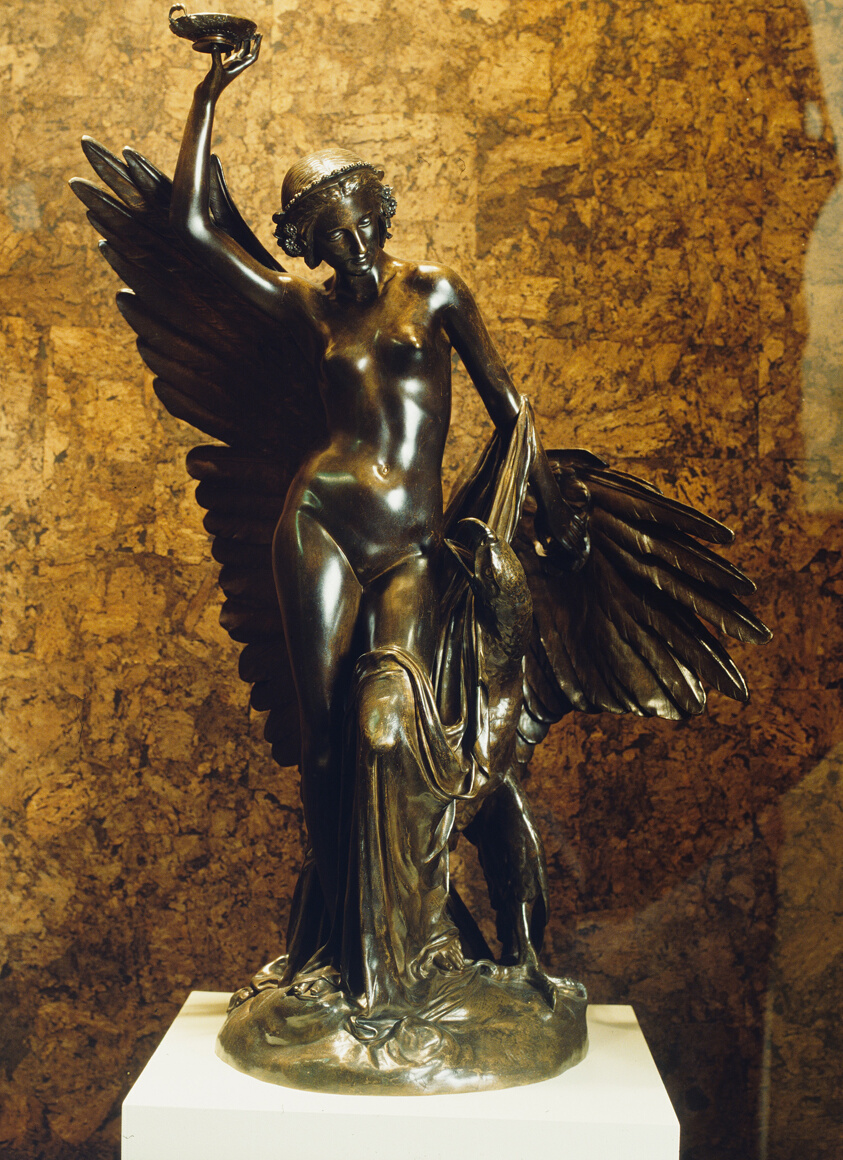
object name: Sculpture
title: Hebe and the Eagle of Jupiter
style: nineteenth century, 19th century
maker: François Rude (French, 1784–1855)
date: Modeled c. 1852, cast c. 1860/80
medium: Bronze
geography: France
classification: statuette; sculpture; bronze; french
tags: mythological figures, cup, Greek mythology, bird, eagles, Greek gods, mythical, mythology, nudes, woman, zeus